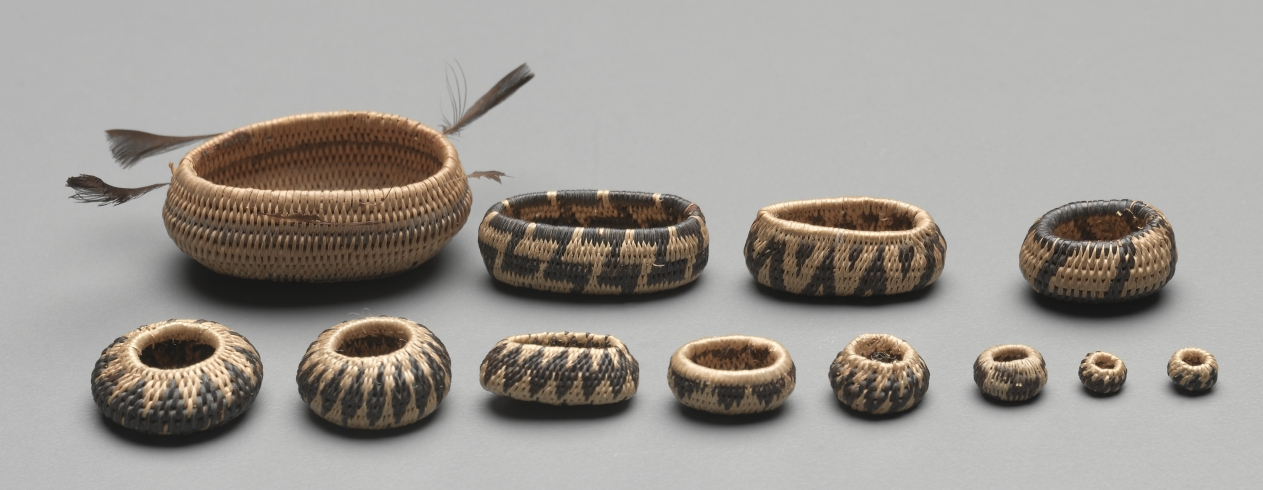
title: Miniature Rhomboidal Basket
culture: California, Pomo, 20th century (?)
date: Early 1900s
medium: coiled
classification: Basketry